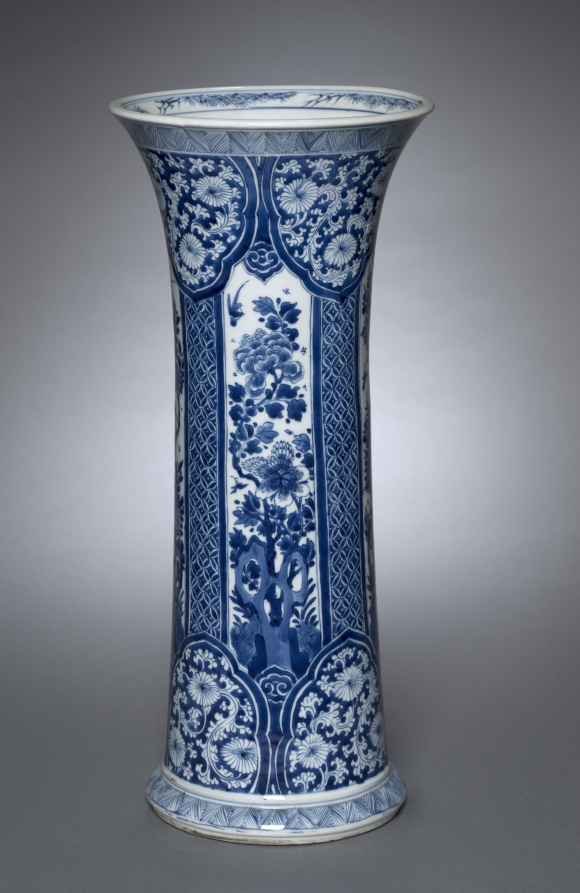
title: Vase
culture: China, Jiangxi province, Jingdezhen kilns, Qing dynasty (1644–1911), Kangxi reign (1662–1722)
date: 1662–1722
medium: porcelain with underglaze blue decoration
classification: Ceramic